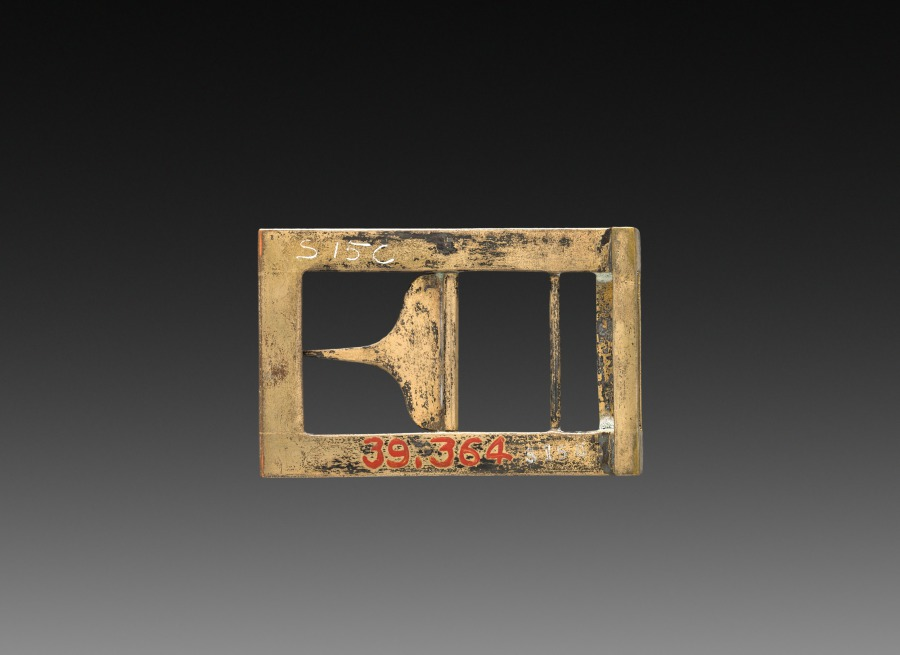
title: Cloisonne Belt Buckle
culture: Japan, Meiji period (1868–1912) to Taishō period (1912–26)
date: early 1900s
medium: cloisonne enamel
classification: Enamel